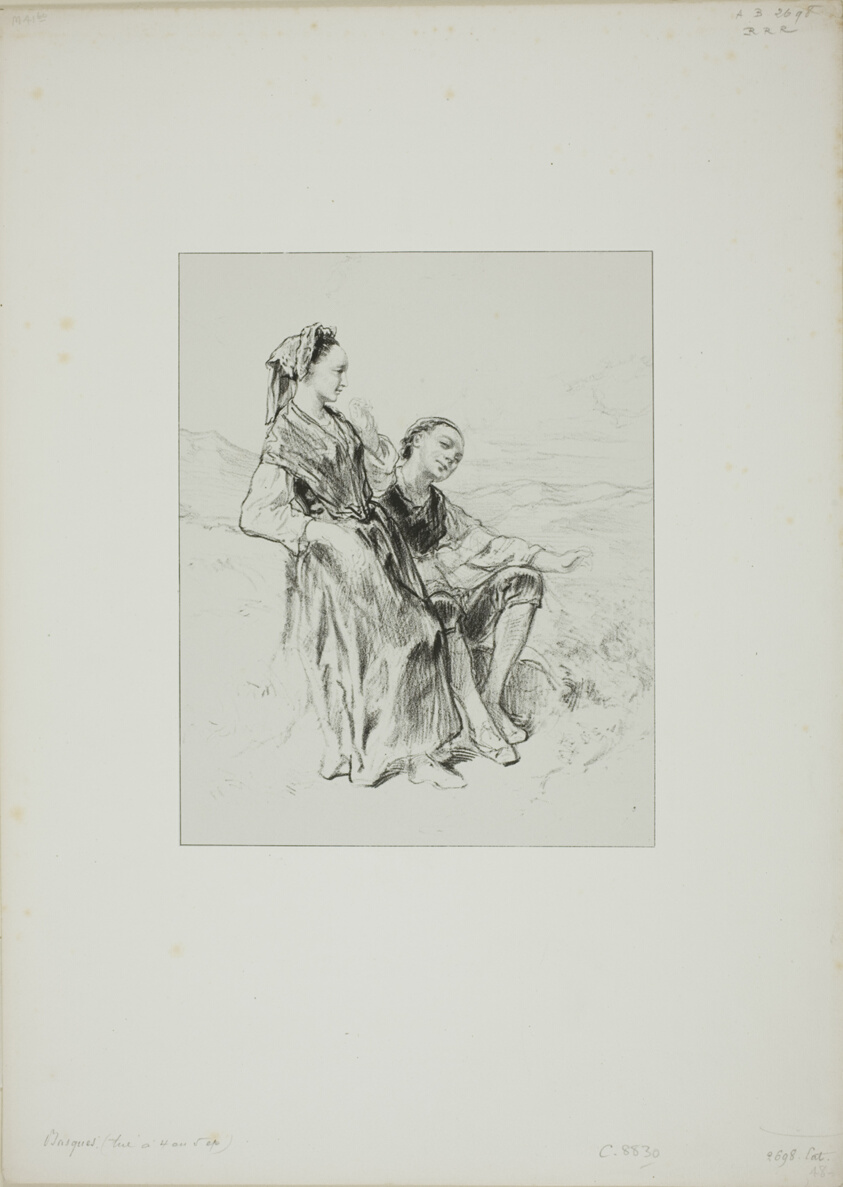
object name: Print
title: Untitled (Two Basque Girls)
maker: Paul Gavarni (French, 1804-1866)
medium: Lithograph in black on light gray China paper, laid down on ivory wove paper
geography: France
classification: lithograph; print; prints and drawing